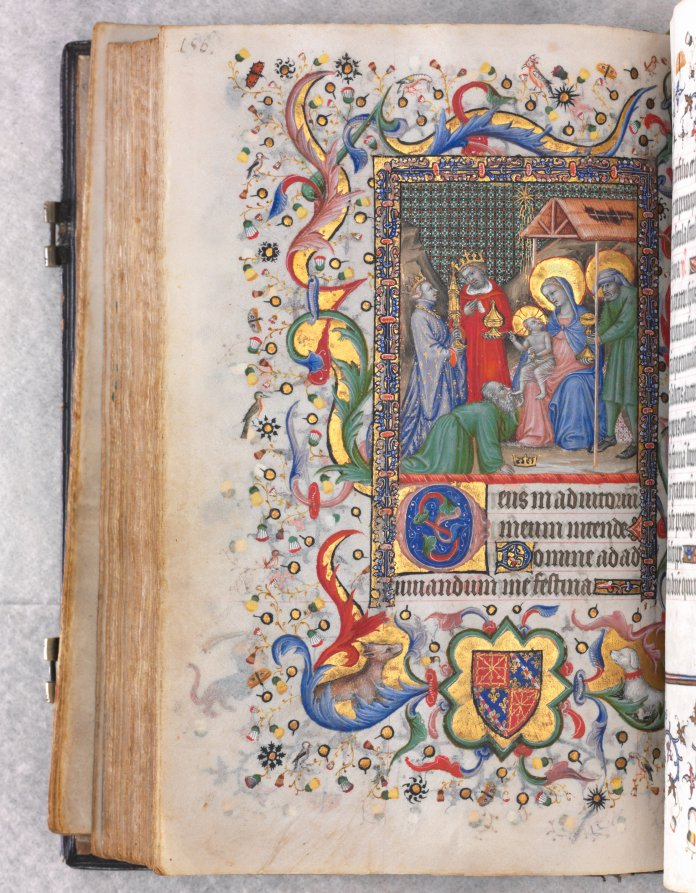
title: Hours of Charles the Noble, King of Navarre (1361-1425): fol. 78v, Adoration of the Magi (Sext)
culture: France, Paris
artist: Master of the Brussels Initials and Associates (French)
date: c. 1405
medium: ink, tempera, and gold on vellum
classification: Bound Volume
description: This precious volume was obviously highly prized by its owner, the French-born King of Navarre, who had his coat of arms painted on no less than twenty folios. Rather than directly commissioning this manuscript from a specific workshop, it seems that Charles the Noble acquired his book of hours -- perhaps ready-made for the luxury market -- while on a trip to Paris in 1404-05. A collaborative effort, six painting styles are evidenced within the pages of this codex, those of two Italians, two Frenchmen, and two Netherlanders. The painter who was responsible for the planning and decoration of the book, and who produced seventeen of the large miniatures, was a Bolognese artist known as the Master of the Brussels Initials. His principal assistant, responsible for most of the borders, was a Florentine who signed his name "Zecho" da Firenze on folio 208 verso.